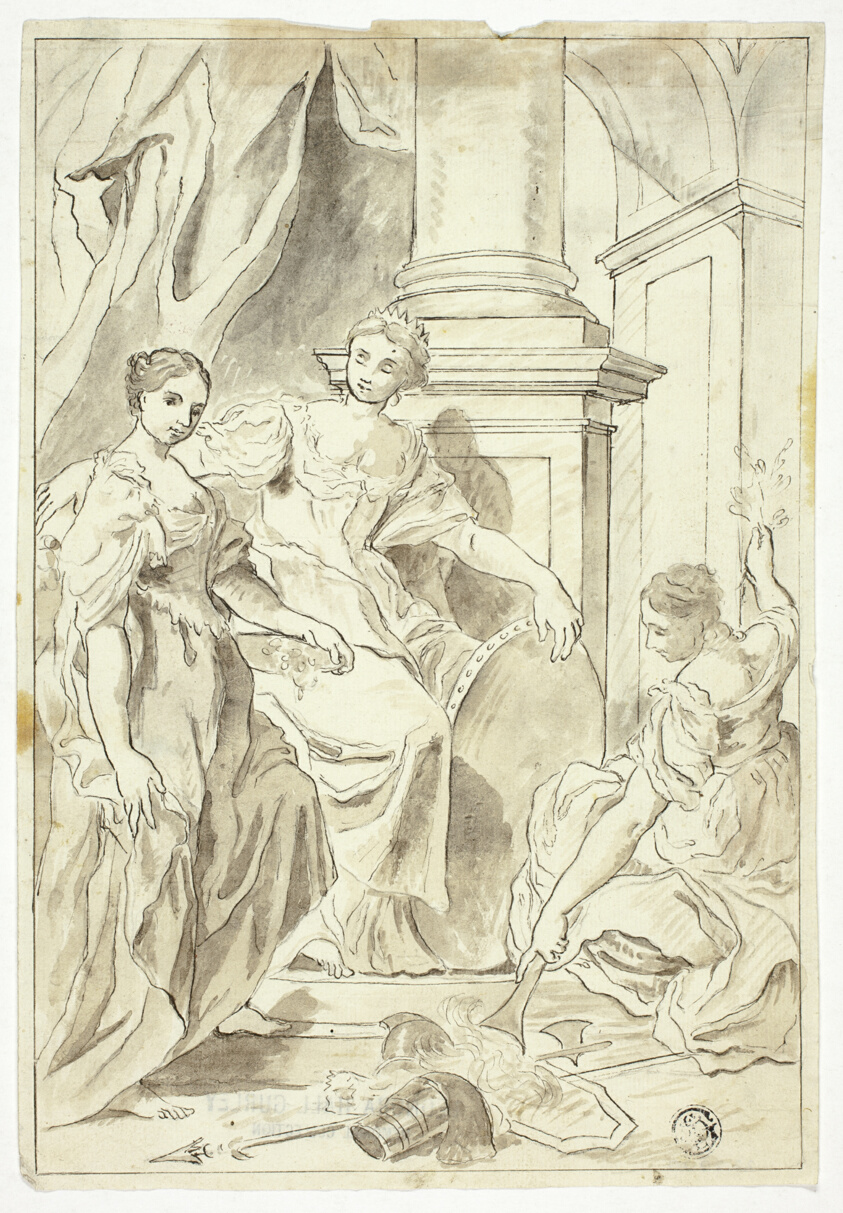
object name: Drawing and Watercolor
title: Allegory of Peace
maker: School of Francesco Solimena (Italian, 1657-1747)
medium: Pen and brown ink, with brush and brown wash, over black chalk, on ivory laid paper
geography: Italy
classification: pen and ink drawings; drawings (visual works); prints and drawing